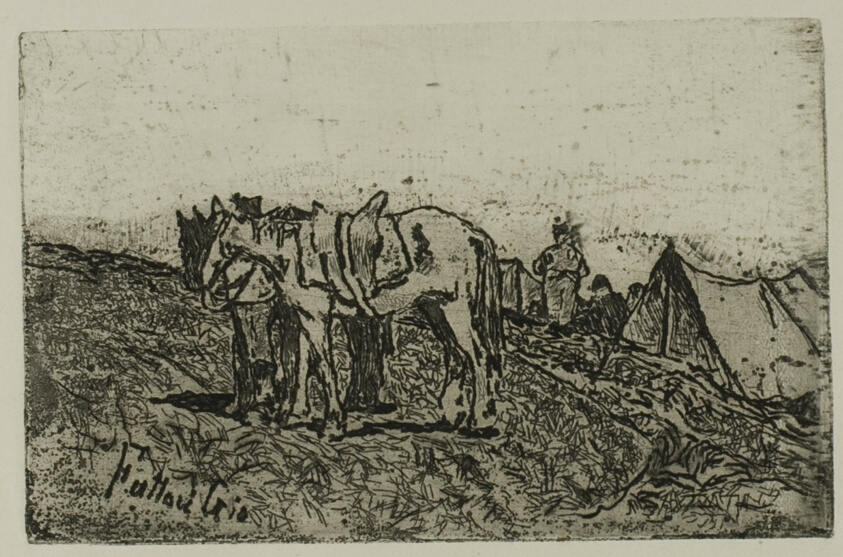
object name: Print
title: Maneuvers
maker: Giovanni Fattori (Italian, 1825-1908)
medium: Soft ground etching, with aquatint, in black on ivory wove paper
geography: Italy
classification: etching; paper; print; prints and drawing